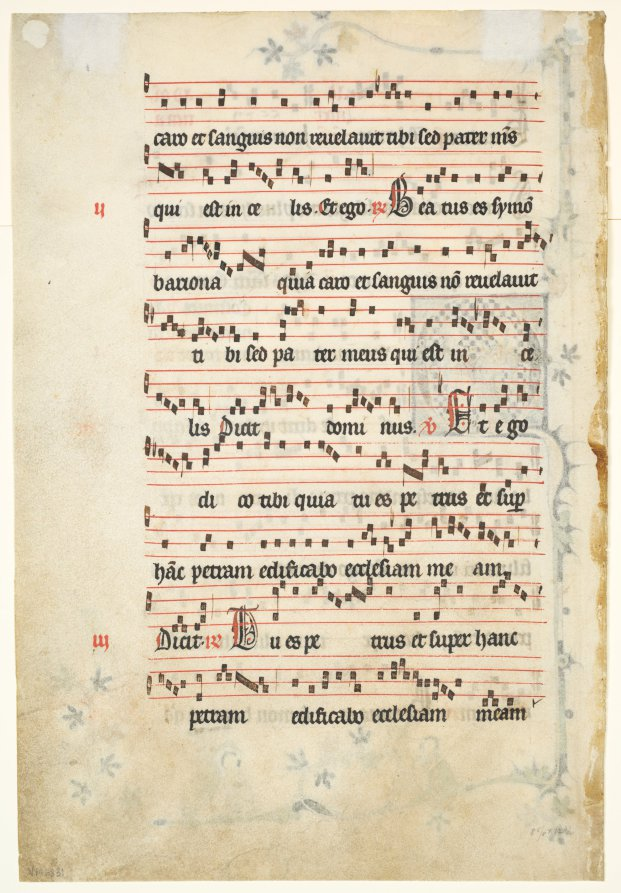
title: Leaf Excised from an Antiphonary: Initial Q with Saints Peter and Paul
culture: South Flanders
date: c. 1325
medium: ink, tempera and gold on vellum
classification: Manuscript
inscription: Quem me [esse] dicitis dixit Ihesus discipulis suis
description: The sheet belonged to an antiphonary, a large liturgical book used by the choir for chanting. It contains all the music and texts needed for daily services in the church. In South Flanders, where this manuscript originates, the Confrérie des Charitables de Saint-Éloi has been active since 1188, when a plague wave raged in the region. This brotherhood was in charge of giving bread to the poor, caring for the sick, consoling the dying, burying the dead, and giving them a burial.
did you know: This leaf comes from a manuscript once owned by the famous Victorian art critic John Ruskin (1819–1900), who removed some of its leaves to give away as gifts.